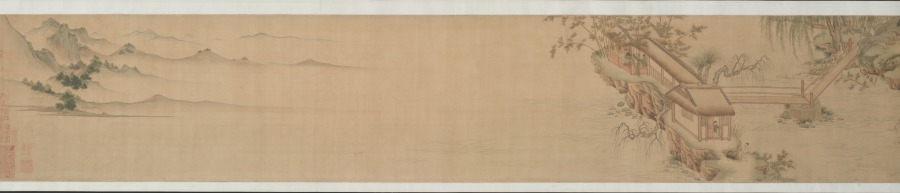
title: Garden for Solitary Enjoyment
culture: China, Ming dynasty (1368–1644)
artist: Qiu Ying (Chinese, 1494–1552)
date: 1515–52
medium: Handscroll; ink and light color on silk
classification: Painting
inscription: Accompanying text of an essay together with seven poems of Sima Guang (1019–1086) and one poem of Su Shi (1037–1101) written by Wen Zhengming (1470–1559) in 1558.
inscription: 2 colophons and 82 seals: 4 seals of Wen Zhengming 文徵明 (1470–1559); 59 seals of Xiang Yuanbian 項元汴 (1525–1590); 1 colophon, dated 1644, and 7 seals of Xiang Yukui 項禹揆 (c. late 1500s–1659); 1 colophon, dated 1880, and 2 seals of Weng Tonghe 翁同龢 (1830–1904); 2 seals of Ch'eng Chen-i (19th c.); 1 seal of Han Ch'ung (19th c.); 4 seals of Wan-go H. C. Weng 翁萬戈 (1918–2020); 3 seals unidentified.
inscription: Colophon by Xiang Yukui 項禹揆 (c. late 1500s–1659): The painting of The Garden for Self-enjoyment on the right by Shih-chou, Mr. Qiu [Qiu Ying] is in the style of Li Lung-mien. Its mood is peaceful, as if meeting the ancient gentlemen face to face among the brushes and silk; it lifts one above the sordid bustle of life. Formerly, my late father handed me this scroll which had only the painting without the written essay. I considered asking a good calligrapher to write the essay to add to it but was afraid that the quality of the writing would not match the painting. Several years later, I saw at a friend's house this essay and poems (of Ssu-ma Kuang] written by Hengshan [Wen Zhengming], once owned by my grandfather; so I spared no expense to obtain it. I rejoiced at this and said: "The divine swords are finally united. How things are pre-destined!" Now my friend Chang Kung-chao's technique for mounting [painting and calligraphy] is excellent. Therefore by daring to take them out and join them together, I can preserve this beautiful story of singular reunion. Xiang Yukui recorded at Hai-yeh-t'ang [hall] two days before New Year's Eve in the jiasheng year of the Chongzhen era [1644]. trans. LYSL/HK/WKH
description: Garden of Solitary Enjoyment refers to a site built in 1073 by the statesman Sima Guang (1019–1086) after he had retired to Luoyang, Henan province. Every spring, visitors would flock to his garden. Each of its seven structures references a historic figure. Sima wrote: I channel streams [like Du Mu], to water flowers [like Bai Juyi], or trim bamboo [like Wang Huizhi]. . . . I know of no joy between heaven and earth that could take its place. Qiu Ying’s painting, created after an 11th-century version of the same theme, must have appealed to garden owners of the Ming dynasty, since it became the template for numerous Suzhou workshop copies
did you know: Sima Guang completed his monumental survey of Chinese history, Zizhi tongjian, in the garden depicted in this painting.